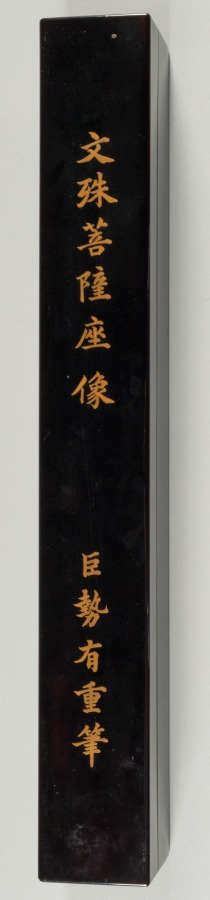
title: Monju as a Child (Chigo Monju)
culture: Japan, Muromachi period (1392–1573)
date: early 1400s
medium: hanging scroll; ink, color, and gold on silk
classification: Painting